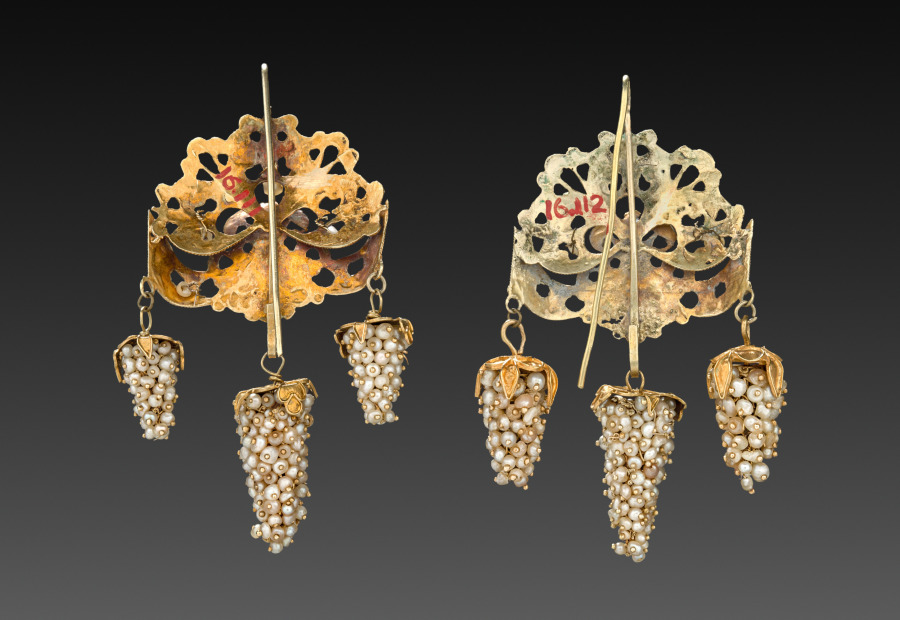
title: Pair of Earrings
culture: Italy, Naples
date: 1700s–1800s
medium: gold and enamel with pearls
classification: Jewelry